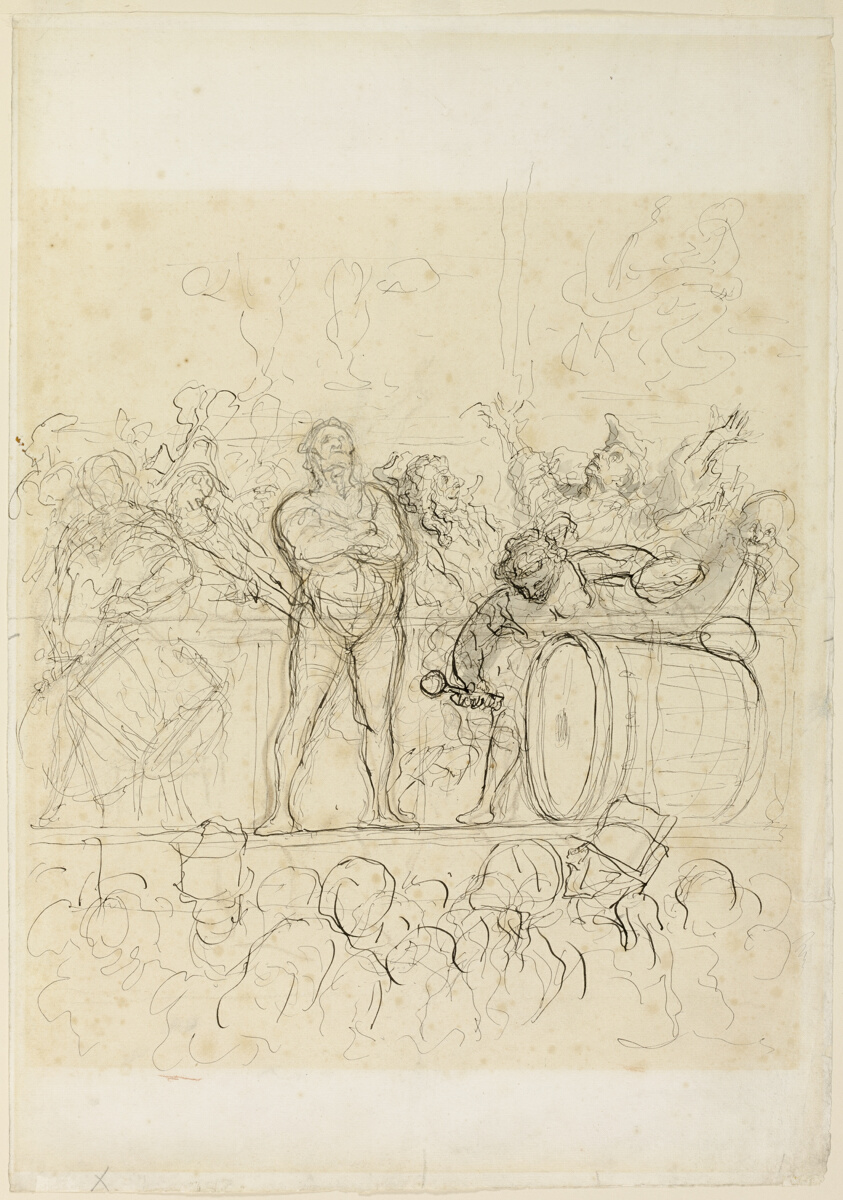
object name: Drawing and Watercolor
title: The Side Show (La Parade)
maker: Honoré Victorin Daumier; French, 1808-1879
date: 1865/67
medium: Pen and black ink and brush and gray wash, with charcoal, on ivory laid paper (discolored to cream)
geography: France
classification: pen and ink drawings; drawings (visual works); prints and drawing